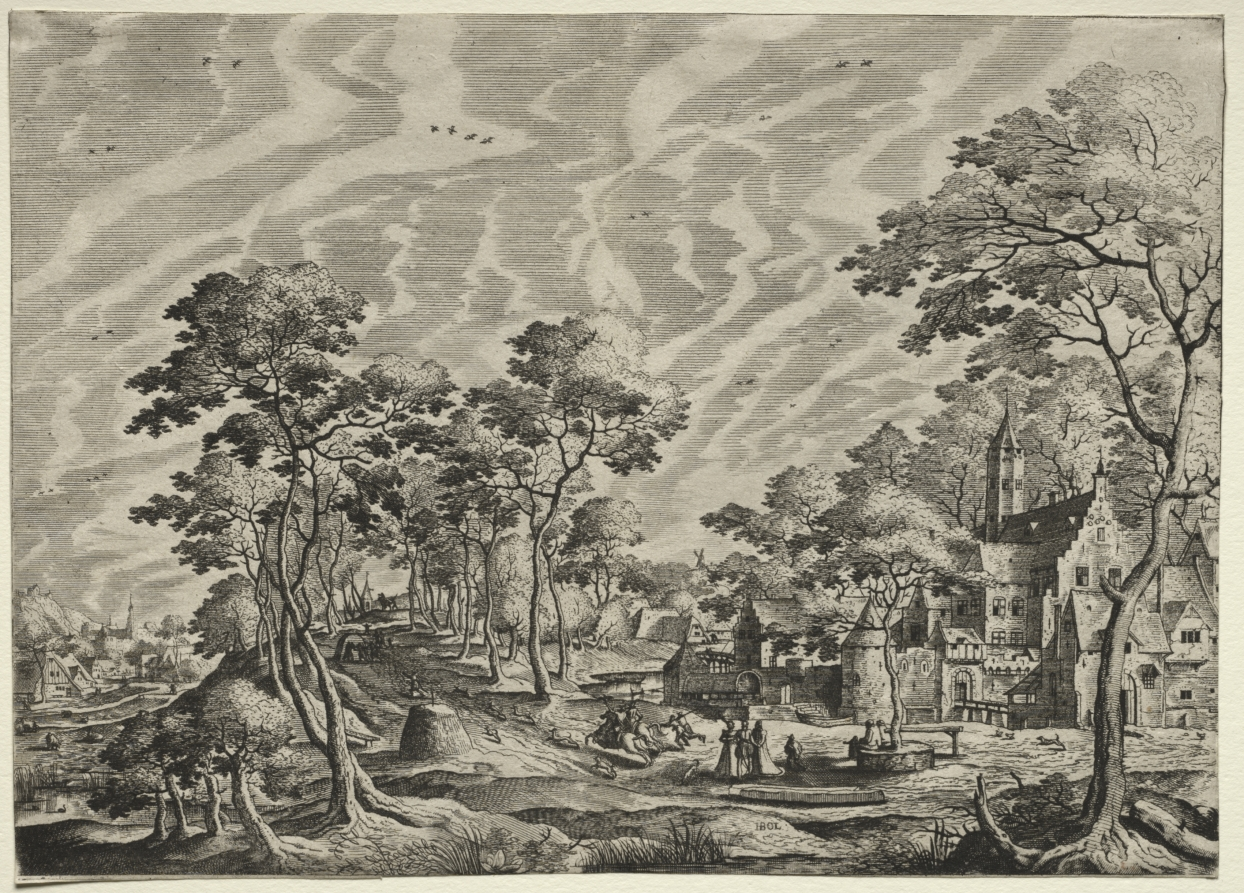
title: Landscape with a Chateau at the right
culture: Netherlands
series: Landscapes with Village Scenes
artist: after Hans Bol (Flemish, 1534–1593)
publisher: Hieronymus Cock (Netherlandish, 1500–1570)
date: 1630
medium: etching and engraving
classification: Print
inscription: lower center, in plate: HBOL ; VERSO, lower left, in graphite: B16671; lower left, in graphite: H. Bol. 1534-1593; lower right, in graphite: EW